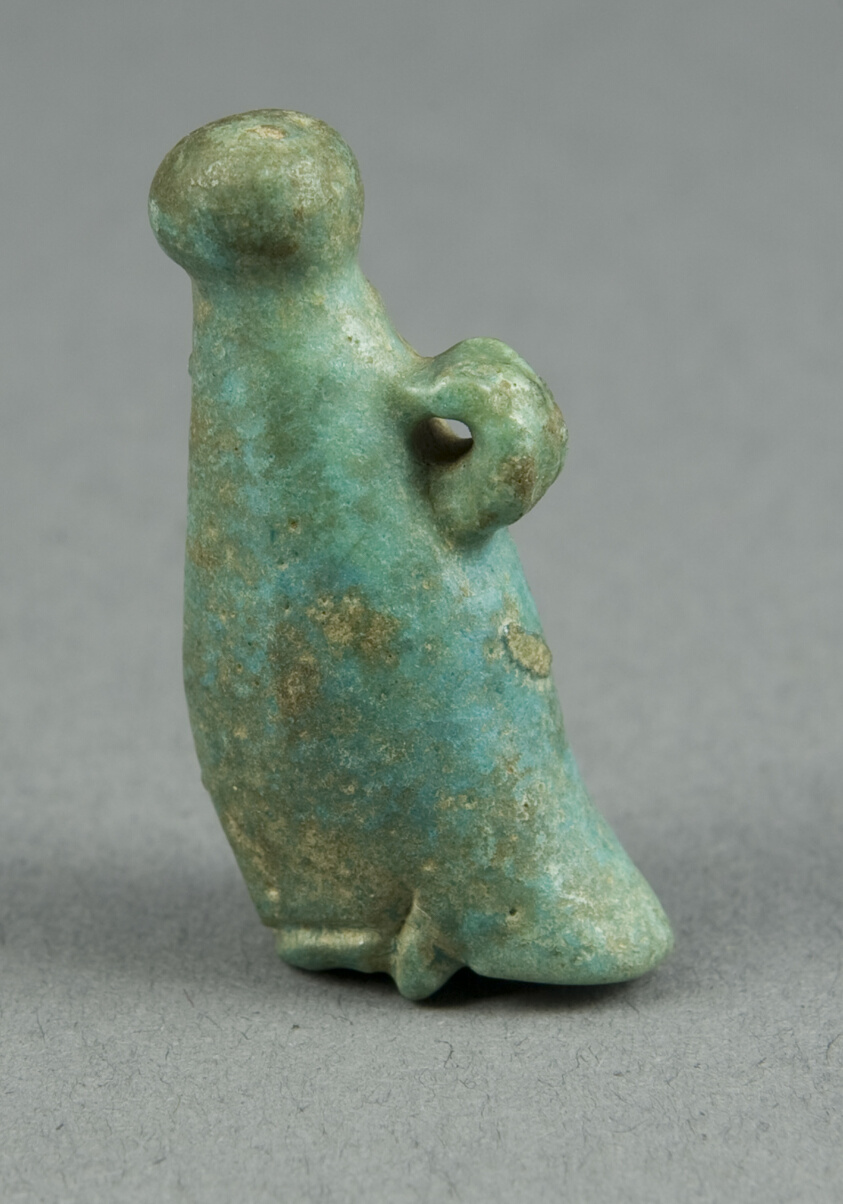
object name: Costume and Accessories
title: Amulet of the White Crown of Upper Egypt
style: egyptian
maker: Egyptian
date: Late Period, Dynasty 26–31 (664–332 BCE)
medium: Faience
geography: Egypt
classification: amulet; ceramics; jewelry; ancient art; costume; faïence (composite material)